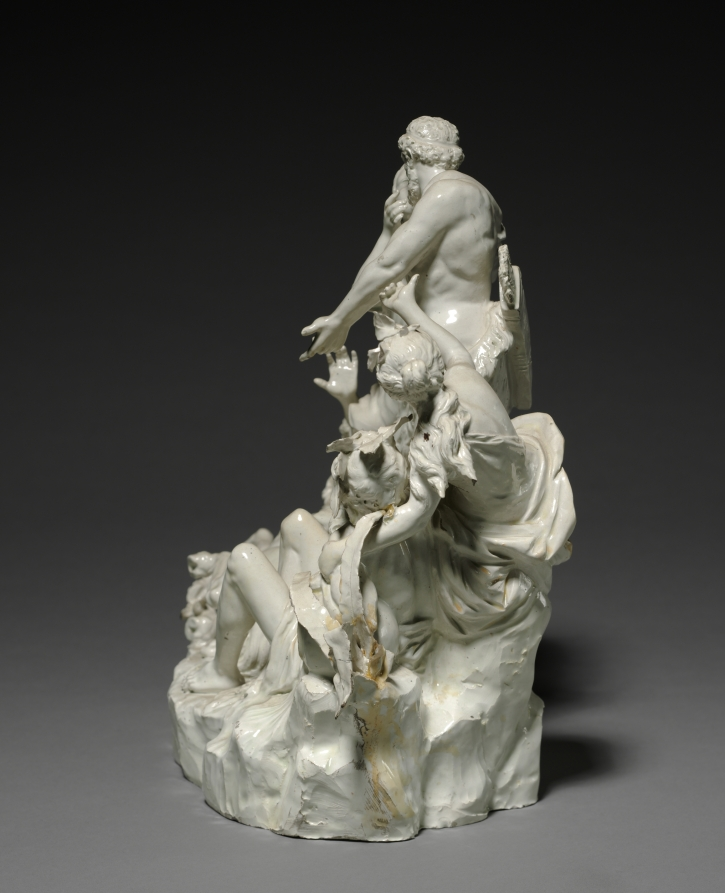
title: Hercules, Deianeira, and Nessus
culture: Italy, Naples, Capo di Monte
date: 1700s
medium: glazed ceramic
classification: Sculpture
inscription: Crowned "N" impressed in paste on the bottom.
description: Charles III, King of Naples, established the Capodimonte royal porcelain factory under his patronage in 1743. Responding to the success of Northern European porcelain factories, the Capodimonte group perfected their soft-paste porcelain and produced a variety of high-quality objects, ranging from Rococo-inspired decorative arts to more sculptural works. This unpainted figural group depicts the climax of an episode from the later life of Hercules. His heroic nature prevented Hercules from adapting to domestic life, much to the dismay of his wife, Dejanira. Growing tired of his absence, on one occasion Dejanira pursued Hercules. When she reached a river she could not cross, Dejanira accepted a ride from a centaur, Nessus, who, after taking her half way, attempted to abduct her. Here we see Dejanira clinging to her husband, who has arrived in time to slay Nessus with a poison-tipped arrow.